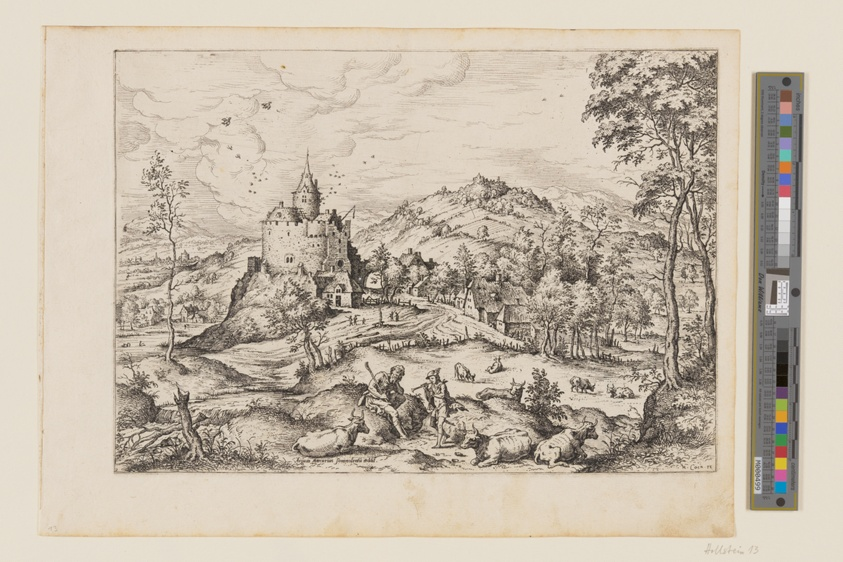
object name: Print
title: Mercury Lulling to Sleep Argus, from Landscapes with Biblical and Mythological Scenes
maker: Hieronymus Cock (Netherlandish, c. 1510–1570); after Matthys Cock (Netherlandish, c. 1505-1548)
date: 1558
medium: Etching on ivory laid paper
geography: Netherlands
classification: etching; paper; print; prints and drawing